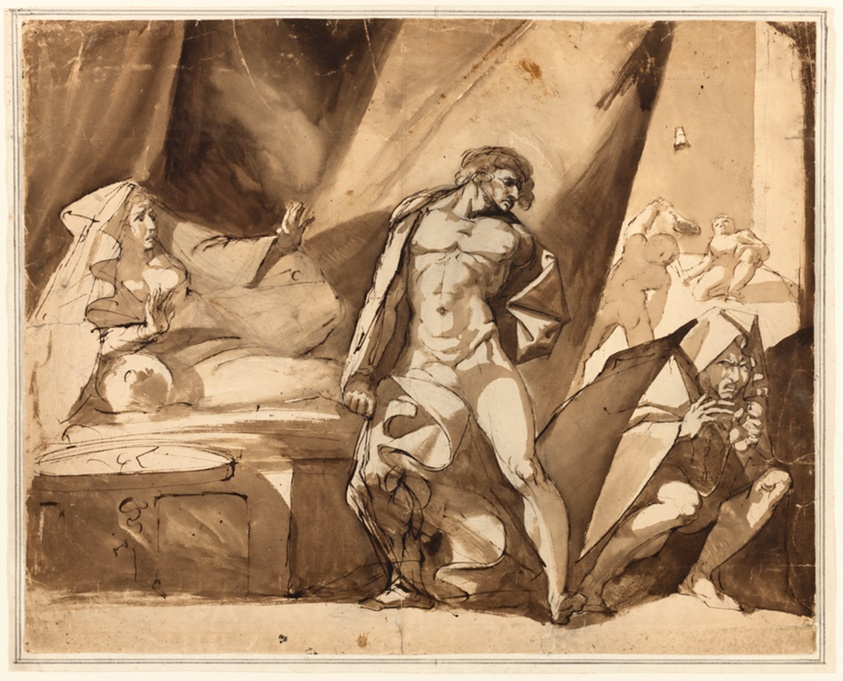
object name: Drawing and Watercolor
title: The Discovery (recto), Two Sketches of Standing Male Figures (verso)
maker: Henry Fuseli (Swiss, active in England, 1741-1825)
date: 1767/69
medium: Pen and brown ink and brush and brown wash, over graphite with traces of opaque brown paint (recto), graphite (verso), on cream laid paper, tipped onto ivory laid paper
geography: Switzerland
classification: pen and ink drawings; drawings (visual works); prints and drawing; paper